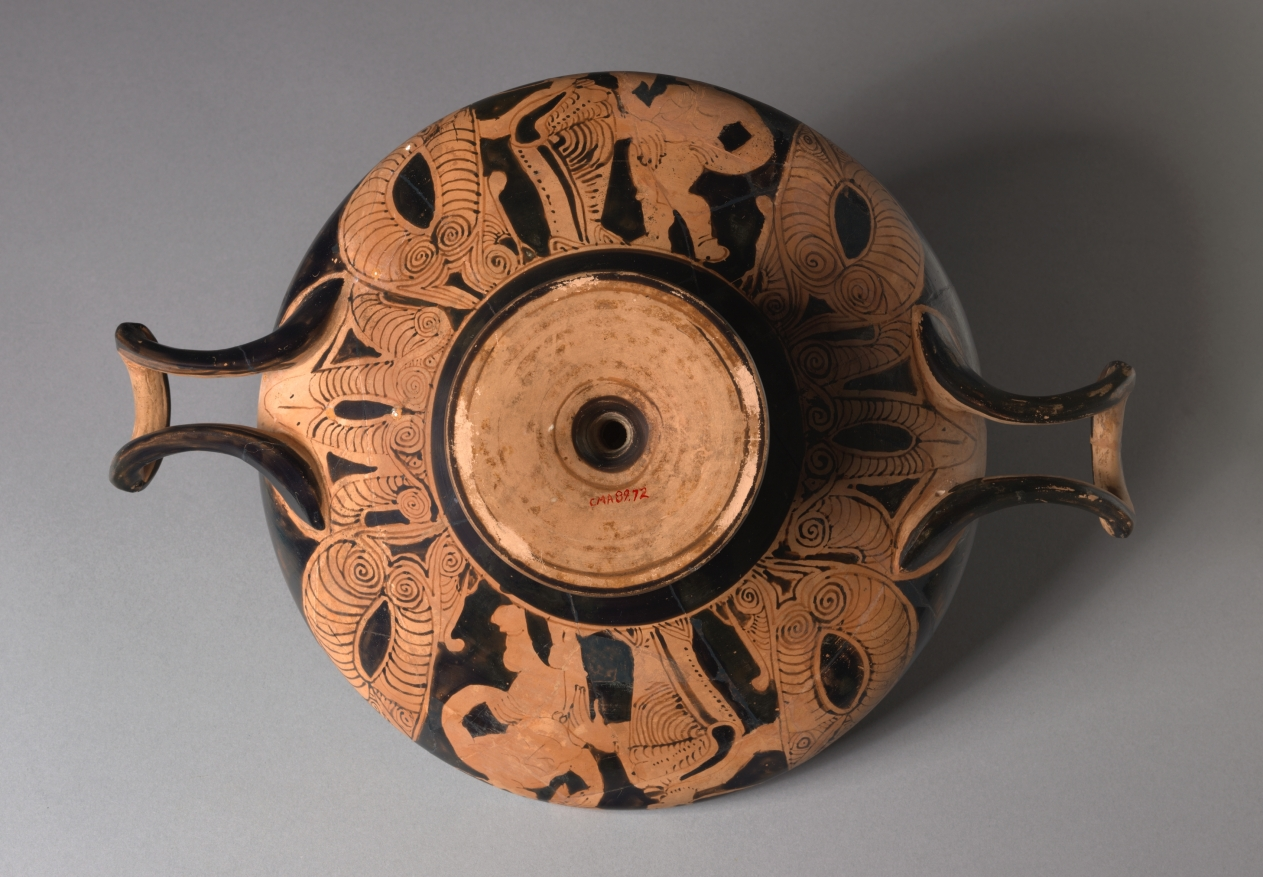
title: Red-Figure Kylix (Drinking Cup): Artemis and Stag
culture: Etruscan or Faliscan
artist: attributed to Clusium Group (Etruscan or Faliscan)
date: c. 350 BCE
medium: ceramic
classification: Ceramic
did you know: The interior of this cup contains a scene of Artemis subduing a spotted deer.